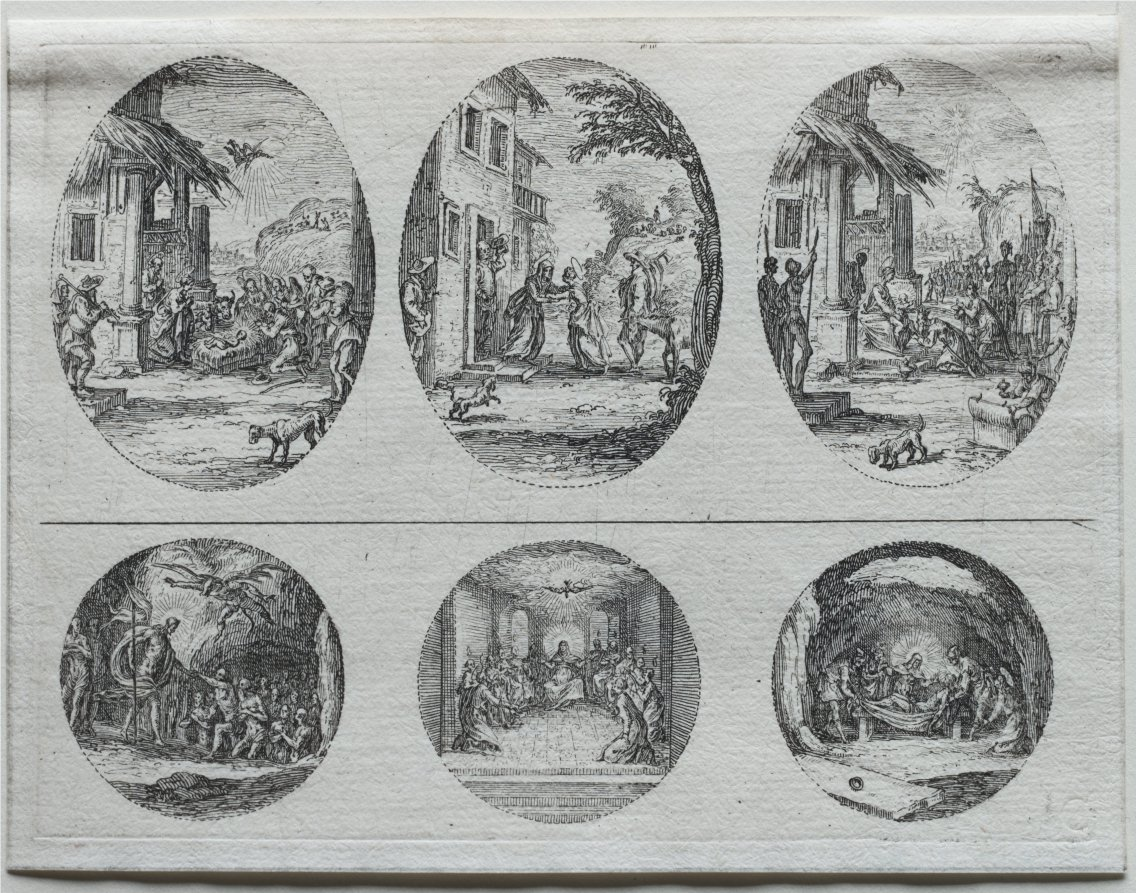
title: The Mysteries of the Passion: The Descent of the Holy Spirit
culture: France, 17th century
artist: Jacques Callot (French, 1592–1635)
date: 1631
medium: etching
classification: Print